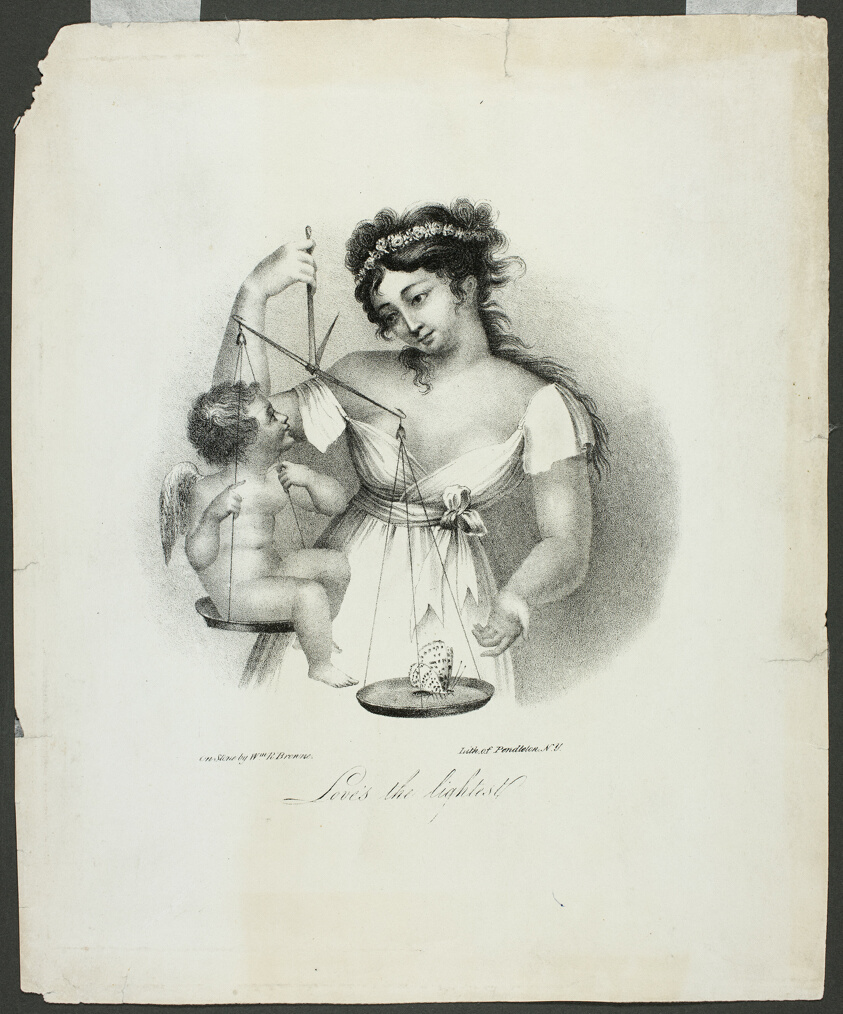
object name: Print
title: Love's the Lightest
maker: William Browne (American, 1814-1877); published by Pendleton Lithography (Boston)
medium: Lithograph on off-white wove paper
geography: United States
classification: lithograph; print; prints and drawing